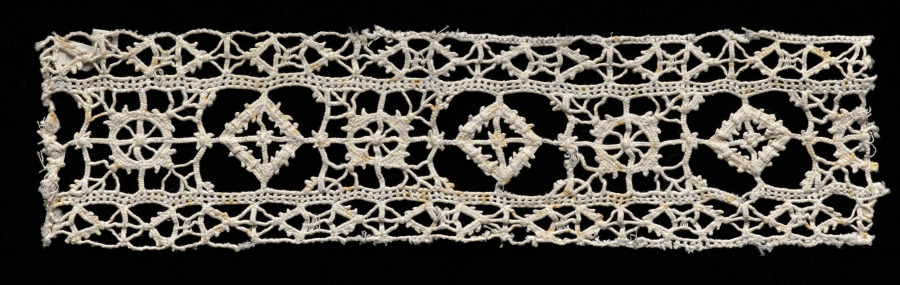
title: Lace Fragment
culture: Italy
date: 1500s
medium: Linen: needle lace (reticella) insertion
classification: Lace